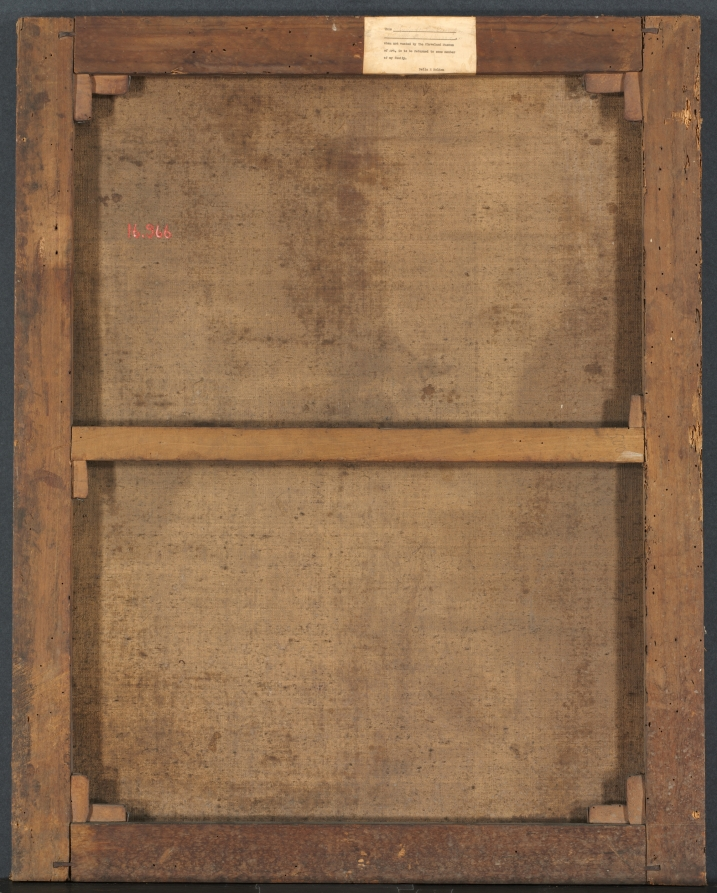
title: Two Putti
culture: Italy, 18th century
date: 1700s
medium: oil on canvas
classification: Painting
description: This painting depicts two playful putti, or cherub figures. One blows his horn into the other's ears; the other covers his ears to protect them. Now obscured by discolored varnish, the painting once had a greenish-blue background, now a mossy green. The pink flesh tones have turned bronze and the gray horn is now a brassy color. In 1519, Correggio painted playful putti in 16 oval ceiling frescoes in the Camera di San Paolo in Parma, Italy. These frescoes were commissioned by the Abbess Gioanna da Piacenza, as the room was her private quarters in the Benedictine nunnery of San Paolo. After the abbess's death, the house was strictly closed to the public for nearly two centuries. Thus Two Putti may be modeled after sketches of the frescoes made during the Abbess's lifetime, or, after the house reopened to the public, the artist may have admired the frescoes directly and modeled these putti after Correggio's originals.